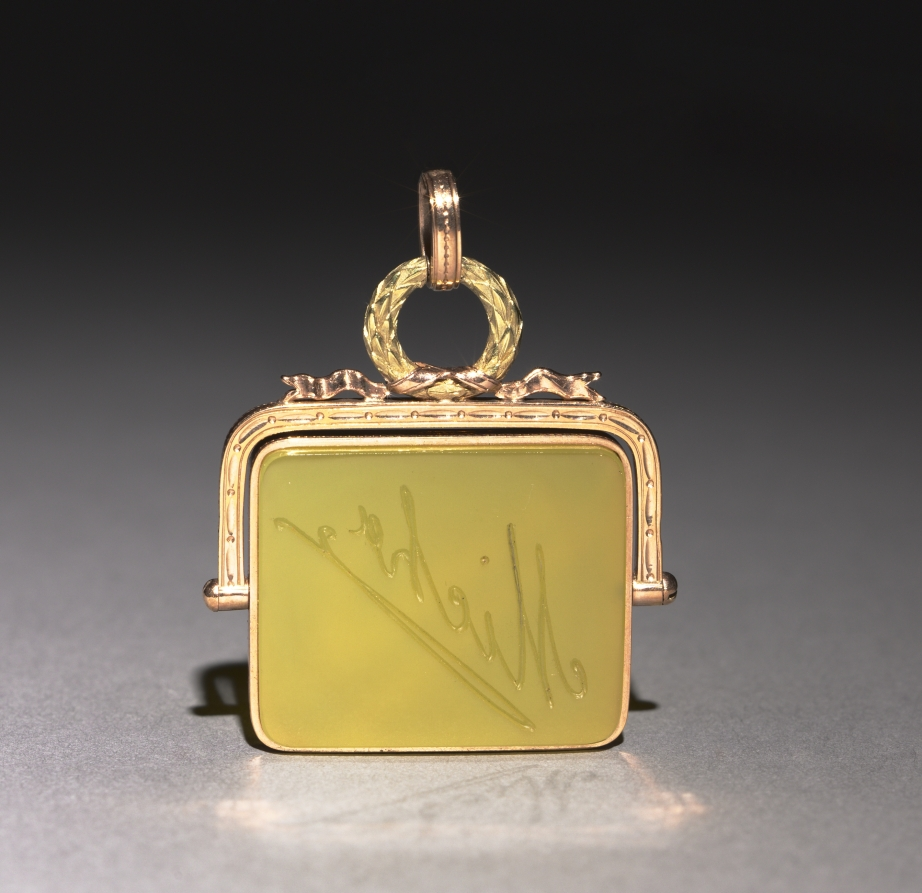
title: Swivel Seal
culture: Russia, St. Petersburg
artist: firm of Peter Carl Fabergé (Russian, 1846–1920)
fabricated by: Mikhail Evlampievich Perkhin (Russian, 1860–1903)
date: before 1896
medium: gold mounts, yellow stone (or glass)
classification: Miscellaneous